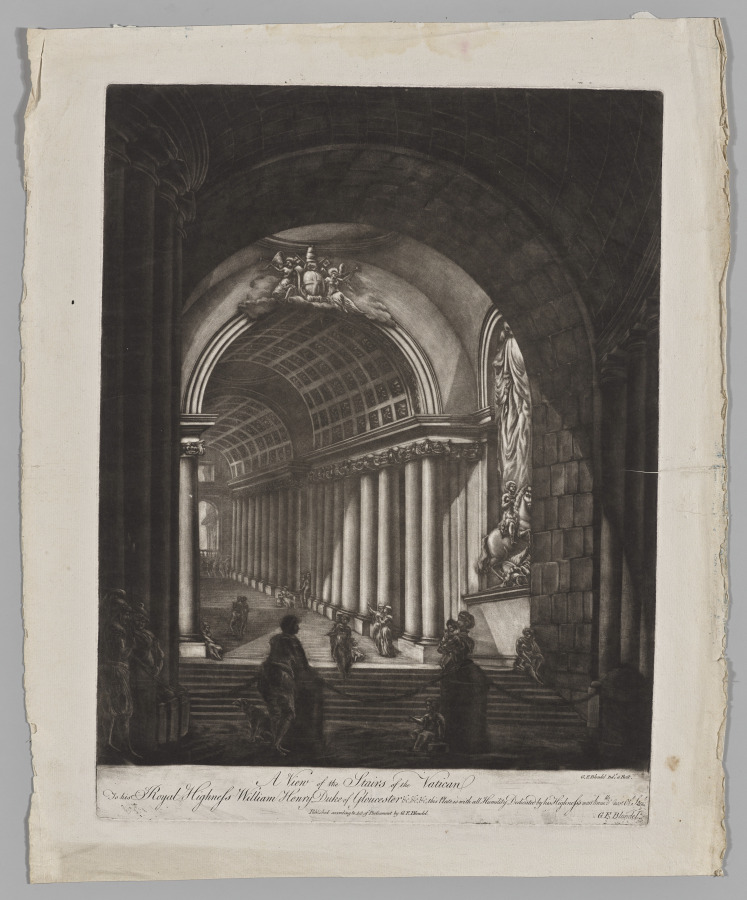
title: A View of the Stairs of the Vatican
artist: Georges Francois Blondel (French, 1730–1800)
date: 1766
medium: mezzotint printed in black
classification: Print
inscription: Imprinted on recto: “A View of the Stairs of the Vatican”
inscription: Imprinted on recto: “G.F. Blondel Del el Fecit.”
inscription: Imprinted on recto: “To his Royal Highness’ William Henry Duke of Gloucester Hc.Hc.Hc. this plate is with all Humility Dedicated by his Highness’s most humble and most ob [illegible]?/Published according to Act of Parliament by G.F. Blondel/G.F. Blondel”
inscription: Watermark: Grand-Jésus stock of T. Dupuy, watermark Name of Jesus (IHS), countermark T Dupuy Fin Auvergne 1742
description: After returning from several years spent in Italy, the French printmaker George-Francois Blondel settled in London in order to take advantage of the English taste for images of Italian sites. This is one of a series of eight prints he published in 1766 depicting imagined and real Italian interiors. Using the relatively new technique of mezzotint, which creates velvety, dark tonal areas, as well as low vantage points, Blondel created towering, awe-inspiring spaces. For special patrons, he printed the plates in sepia ink, rather than in black; the CMA’s set includes two of these unusual sepia impressions.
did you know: Mezzotint was relatively new at the time this print was made and had yet to be utilized for such large plates of an architectural nature as seen here.